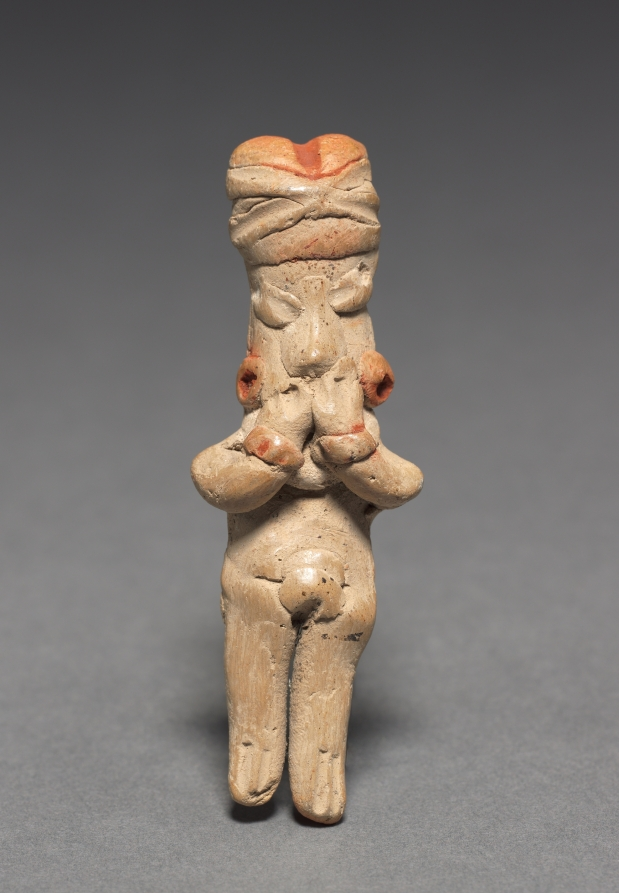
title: Female Figurine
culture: Mesoamerica, Mexico, Guanajuato, Chupícuaro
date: c. 400–100 BCE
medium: earthenware with pigment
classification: Sculpture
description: Small, solid, hand-modeled figurines were a staple of the early Mesoamerican artistic repertoire. Made in distinctive styles corresponding to geographic regions, they likely were used in a variety of contexts, including rites to assure health, fertility, and prosperity. This example is from the Chupícuaro region, north of modern-day Mexico City.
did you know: This figurine is small enough to fit comfortably in the palm of a hand.